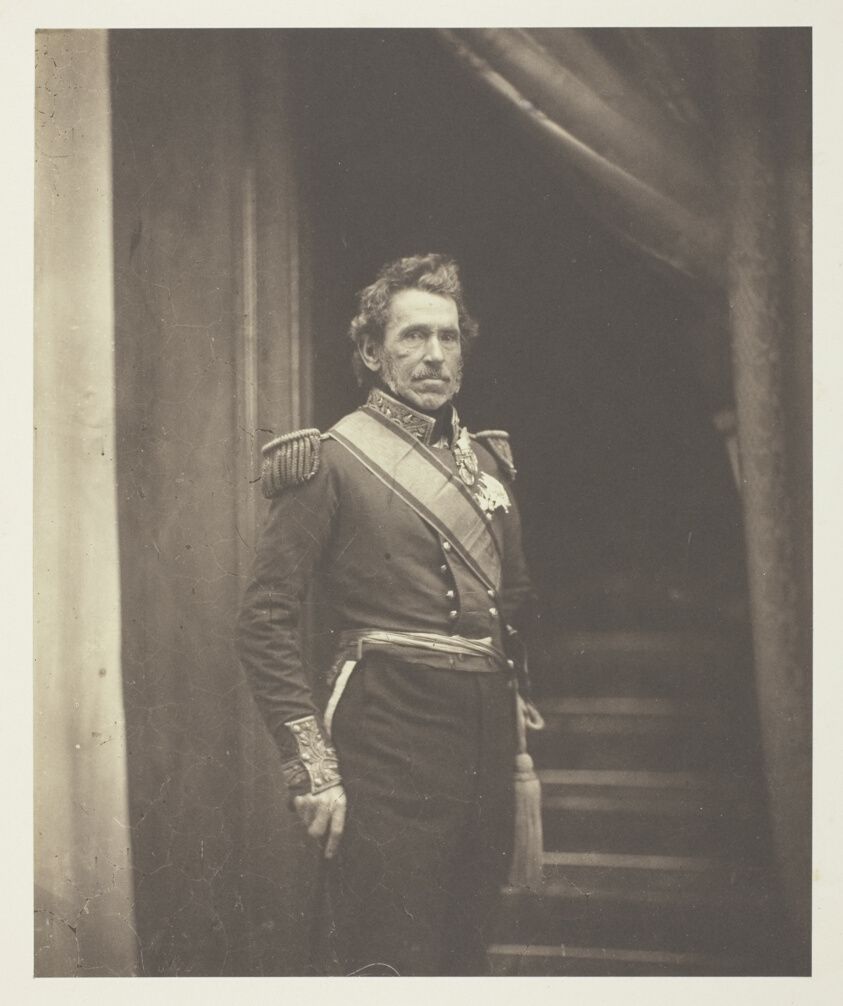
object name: Photograph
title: Lieutenant General Sir de Lacy Evans, G.C.B.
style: 19th century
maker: Roger Fenton (English, 1819–1869)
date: 1855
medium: Salted paper print, plate 11 from the album "Photographs Taken in the Crimea" (1856)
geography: England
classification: salted paper print; photographic process; photography; photograph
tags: Collected by Hugh Edwards, Crimea 1856